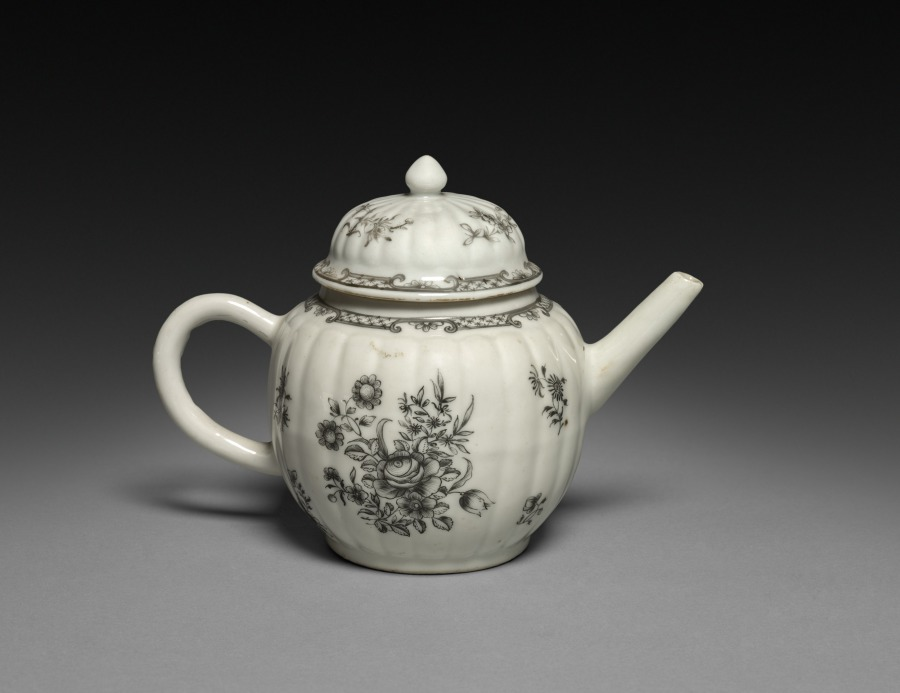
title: Teapot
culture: China, Chinese Export -- European Market, 18th century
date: c. 1750–1770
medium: porcelain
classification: Ceramic